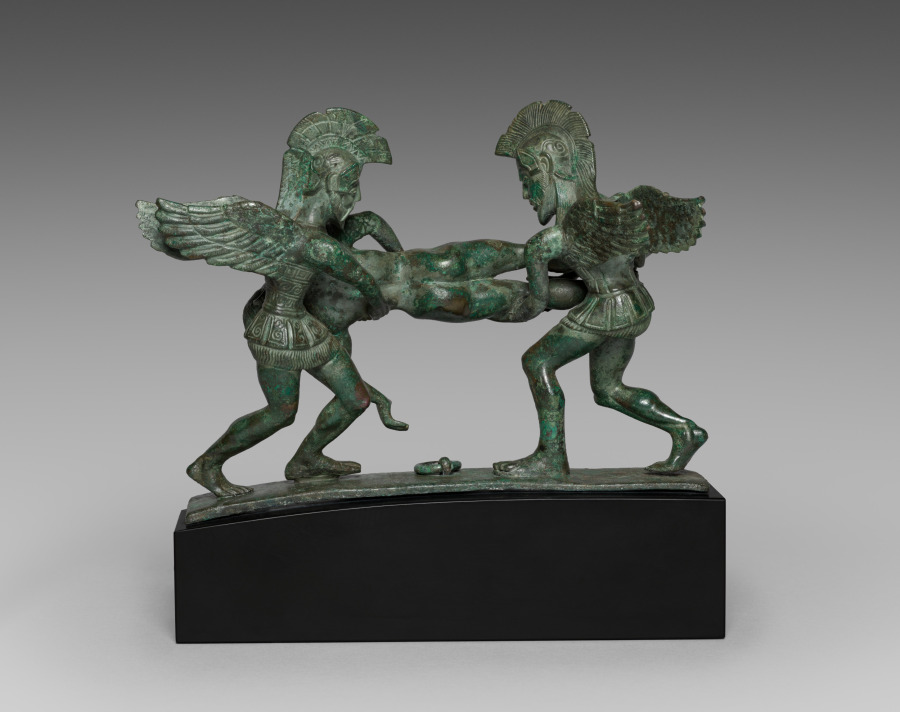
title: Sleep and Death Cista Handle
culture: Etruscan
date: 400–375 BCE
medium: bronze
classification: Sculpture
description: Designed for attachment to the lid of a large bronze cista, a cylindrical lidded box, these three figures probably represent Sleep (Hypnos) and Death (Thanatos) holding the body of Sarpedon. A son of Zeus who helped to defend Troy from invading Greek forces, "godlike Sarpedon of the brazen helmet" fell at the hands of Patroclus, as told by Homer in Book XVI of the Iliad. Apollo then intervened to protect the body, removing it from danger and entrusting it to the two winged deities, as depicted here and in a number of other ancient artworks, Greek and Etruscan alike. If not Sarpedon, the fallen warrior could be Memnon, the son of Eos and Tithonos slain by Achilles.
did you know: These three figures were cast in eight separate pieces, then welded together and attached to the rectangular base.